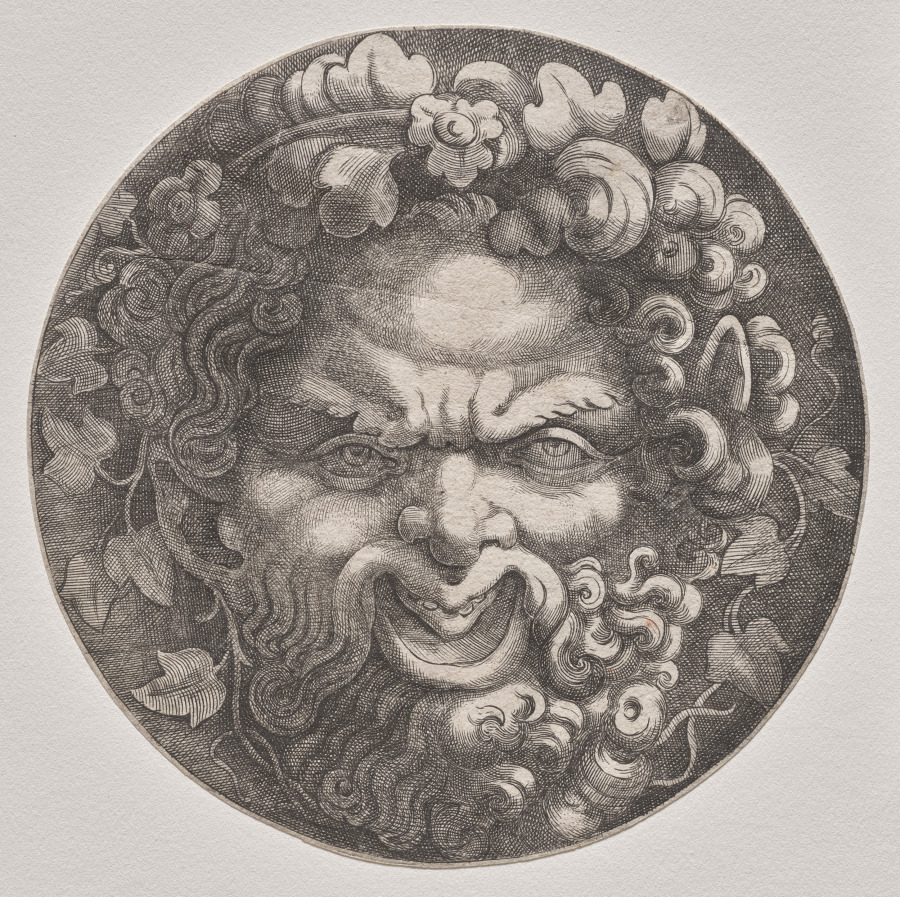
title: Head of Silenus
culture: Italy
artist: Adamo Scultori (Italian, c. 1530–1585)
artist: after Giulio Romano (Italian, 1492/99–1546)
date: c. 1547–87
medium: engraving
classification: Print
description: This engraving by the Mantuan artist Adamo Scultori is based on an untraced design for stuccowork designed by Giulio Romano at the duke of Mantua’s Palazzo del Te. Silenus was the mythological teacher of Bacchus. Known for his great wisdom, which was enhanced by wine, he was often portrayed as the embodiment of overindulgence and revelry. Adamo emphasized these qualities in Silenus’s slightly inebriated expression and extended tongue. The dark contrasts and heavily worked, hatched areas of the engraving create deep shadows that relay the character of relief carving, like stucco.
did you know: This engraving’s circular cut plate imitates circular decorative elements featuring grotesque heads, such as those found on doorframes and other architectural borders in Renaissance architecture.